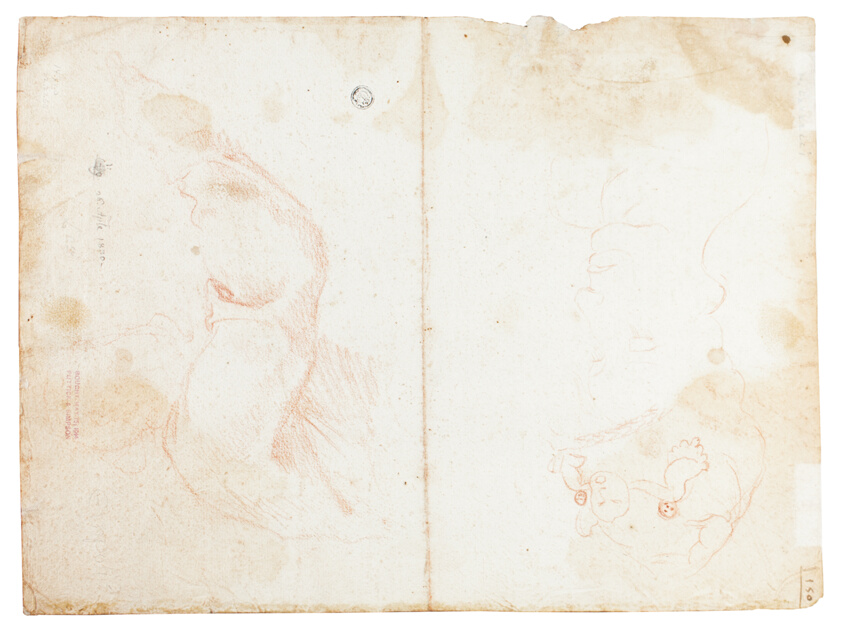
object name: Drawing and Watercolor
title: Standing Angel (recto); Study of Face and Drapery (verso)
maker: Probably Domenico Fiasella (Italian, 1589-1669); or possibly Bernardo Strozzi (Italian, 1581-1644); or possibly Lodovico Carracci (Italian, 1555-1619)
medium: Black and red chalk (recto), and red chalk (verso), on ivory laid paper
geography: Italy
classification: chalk; drawings (visual works); prints and drawing